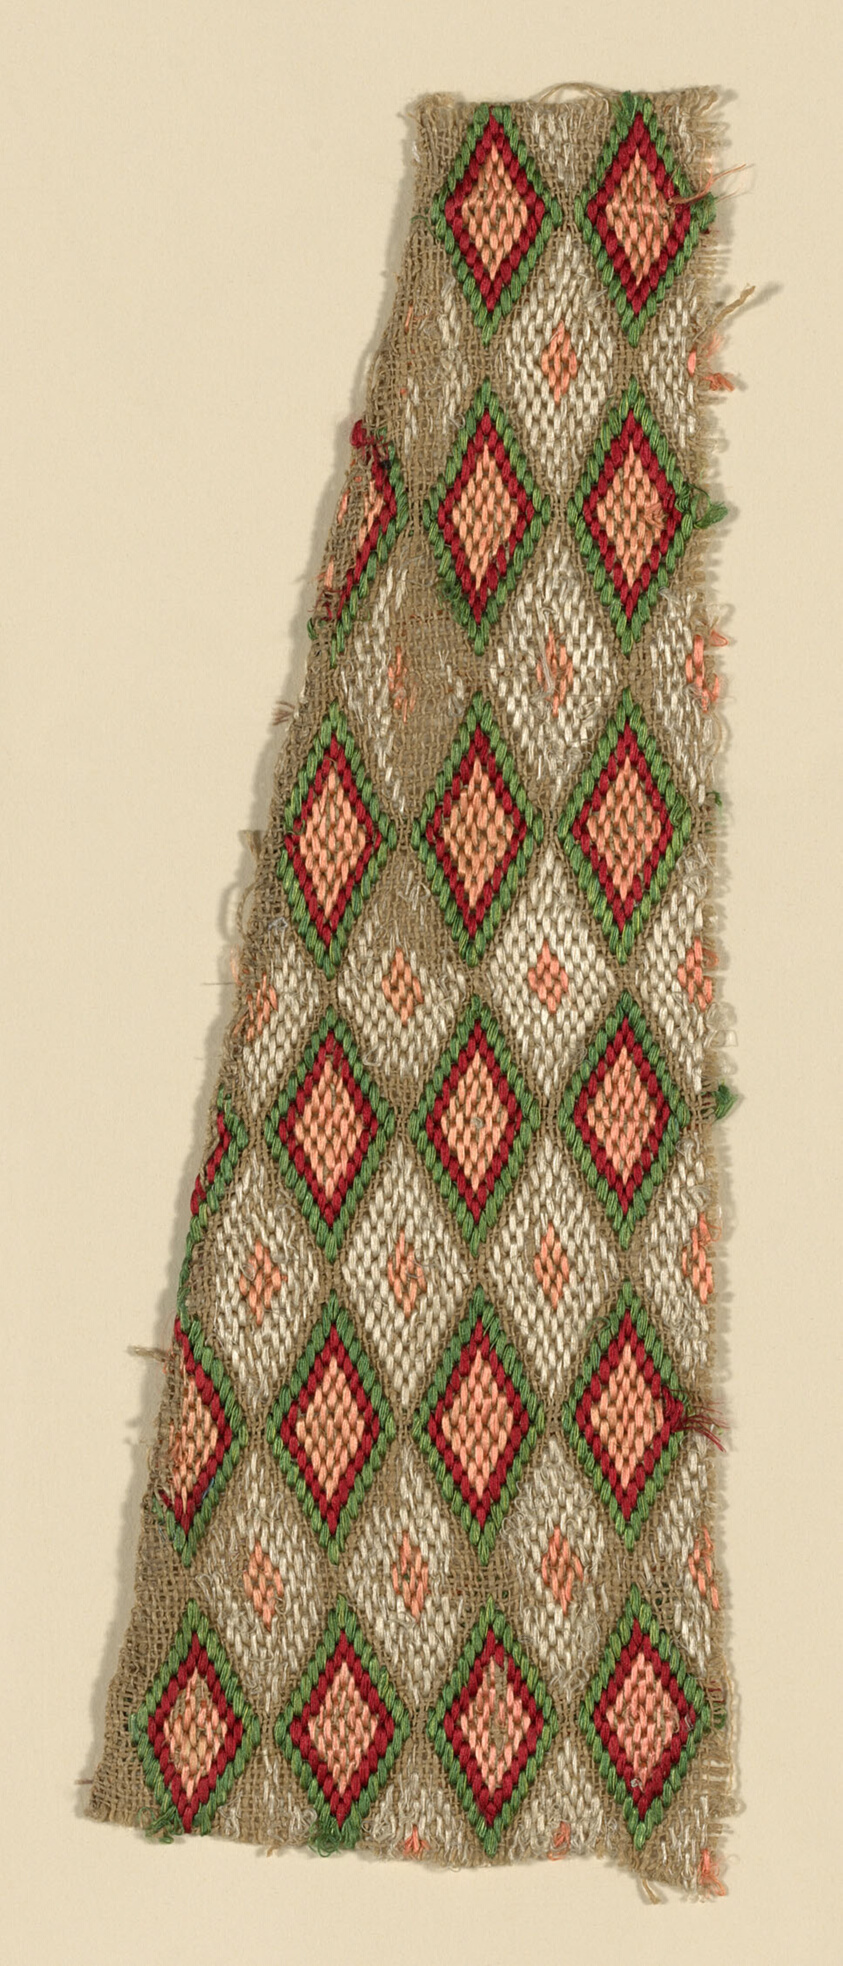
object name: Textile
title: Fragment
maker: Italy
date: 18th century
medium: Linen; embroidered with silk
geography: Italy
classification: textile; needlework (visual works)